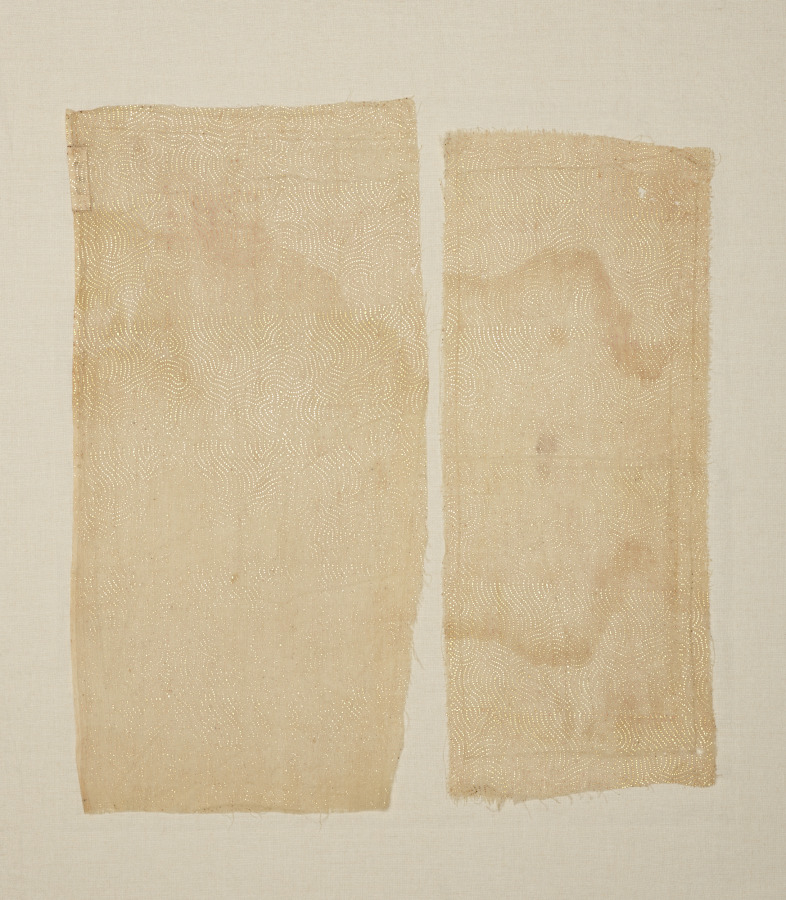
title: Fragment of Draped Apparel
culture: India, Rajasthan or Northern Deccan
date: 1700s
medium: Block printed with gold leaf (varak) on undyed plain weave cotton muslin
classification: Textile